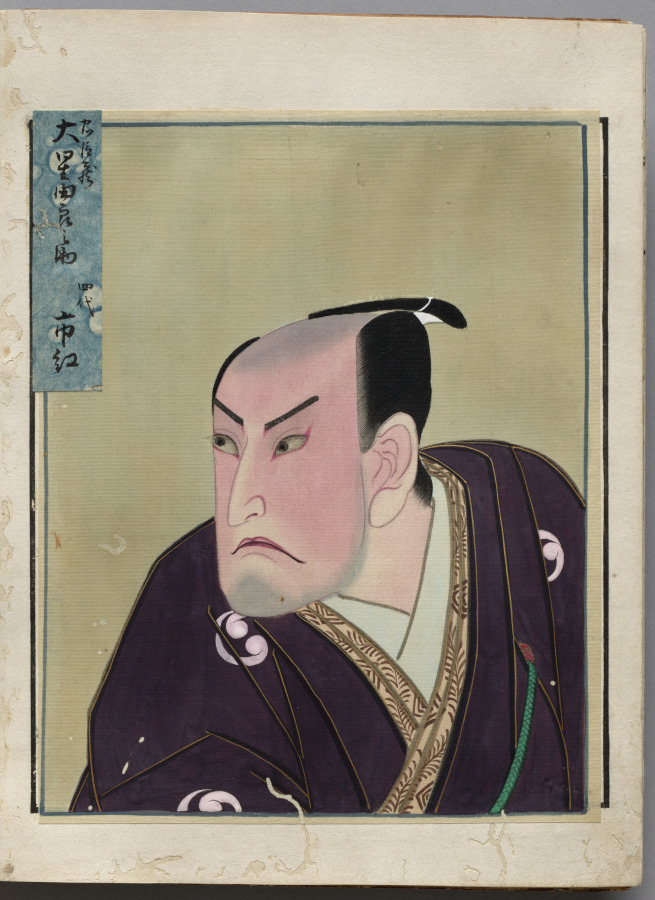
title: Double-Leaf from Album of Actor Portraits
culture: Japan, Edo period (1615–1868)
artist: Shōrakusai (Japanese)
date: c. 1790–1810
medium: double-leaf from an accordion-style album; ink and color on silk (right) and ink on paper (left)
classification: Bound Volume